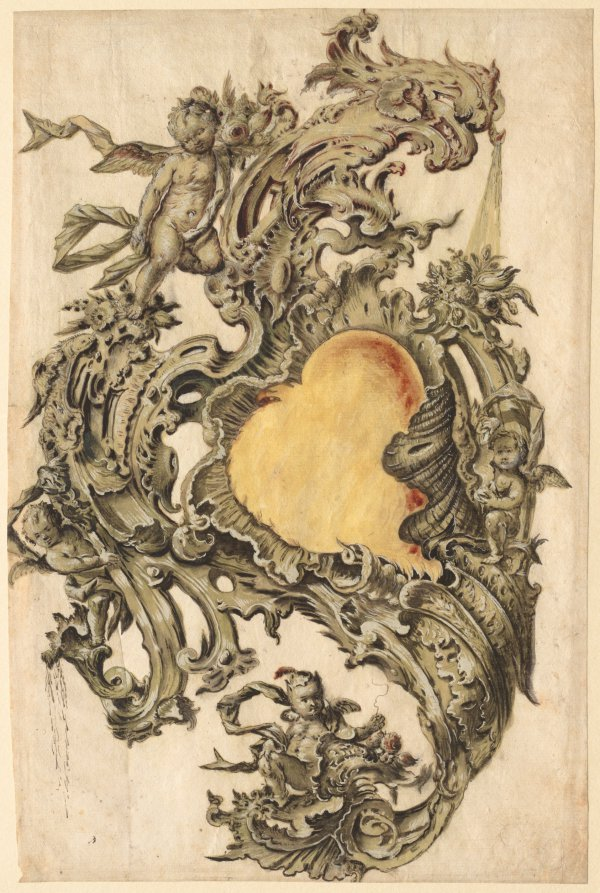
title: Cartouche with Putti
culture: Germany, 18th century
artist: Franz Xaver Habermann (German)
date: second half 1700s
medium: pen and black ink and brush and gray, black, green, yellow, and red wash, heightened with white gouache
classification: Drawing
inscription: Watermark: Heawood 3059